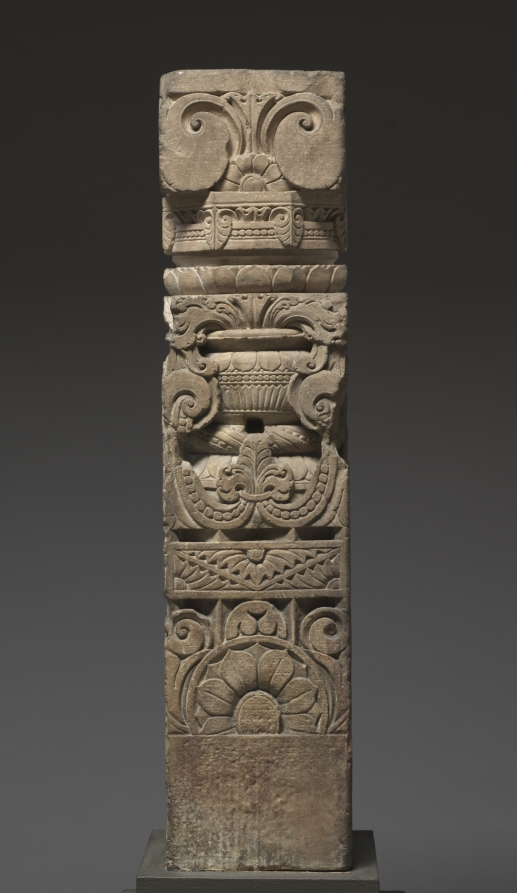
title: Monolithic Pillar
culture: Northern India, Mathura, early medieval period, 7th-8th century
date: 600s–700s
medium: red sandstone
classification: Sculpture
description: The central motif of this temple pillar is a pot, out of which vegetal forms exuberantly emerge, indicating bounty and abundance. The pot itself is decorated with lotus petals, leaves, and a band of pearls. The overflowing pot is a pervasive symbol in India to reference the prosperity and productivity that will result from worship and prayers at the holy site. It also symbolizes the auspiciousness and beauty of the created world.